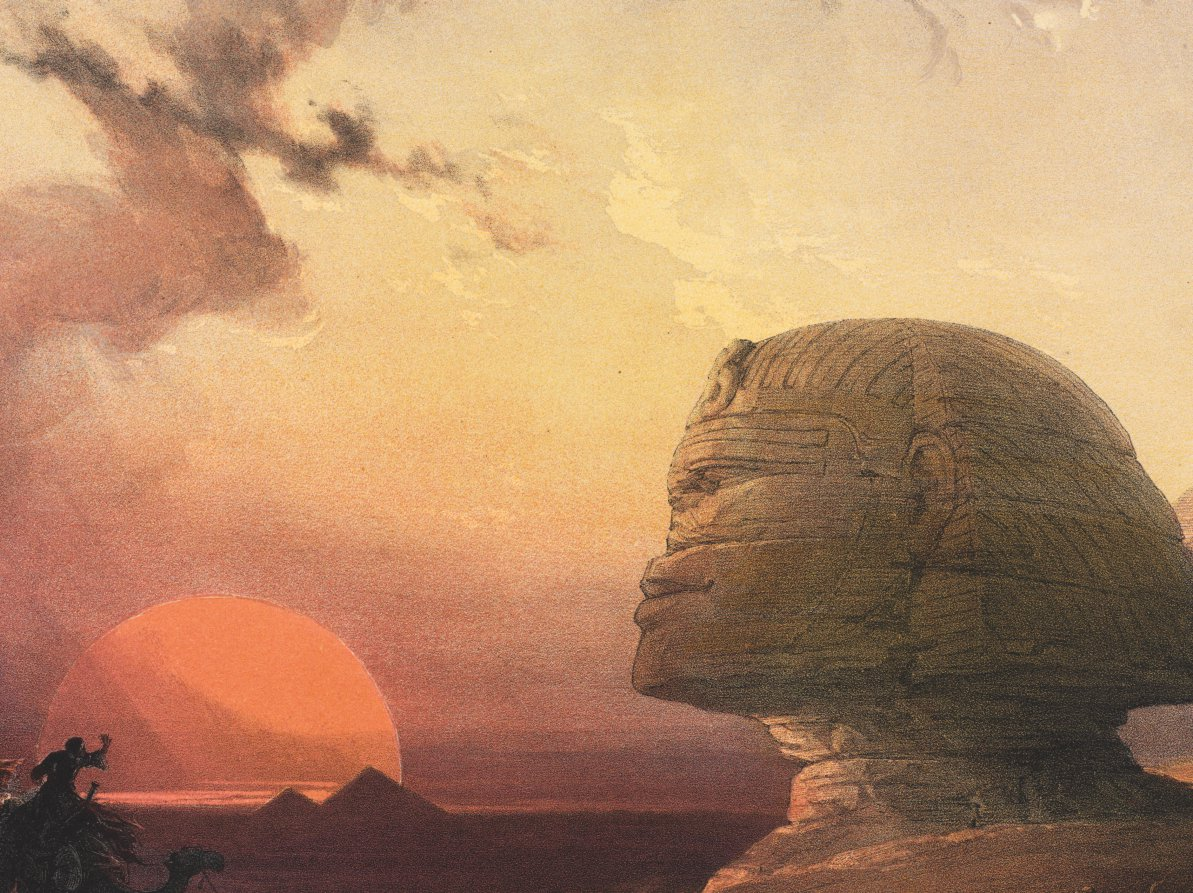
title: Egypt and Nubia, Volume III: Approach of the Simoon-Desert at Gizeh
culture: England, 19th century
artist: Louis Haghe (British, 1806–1885)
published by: F. G. Moon (British, 1797–1871)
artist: after David Roberts (Scottish, 1796–1864)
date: 1849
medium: color lithograph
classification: Print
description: The invention of photography was announced in 1839, but photographers did not arrive in Egypt until around 1850. Prior to that, general knowledge about the ancient sites came from writings and reproductions of the paintings and drawings of adventurous artists. Roberts, the first British artist to produce a series of Egyptian views, traveled through the Middle East in 1838–40. Back in England, he worked with Haghe to translate his drawings into color lithographs, which were published between 1842 and 1849 as an opulent series of portfolios. A stimulating mixture of documentation and romanticism that still moves today’s viewers, Roberts’s images appeared just before the availability of photographic depictions of the region and inspired the photographers who followed in his footsteps.